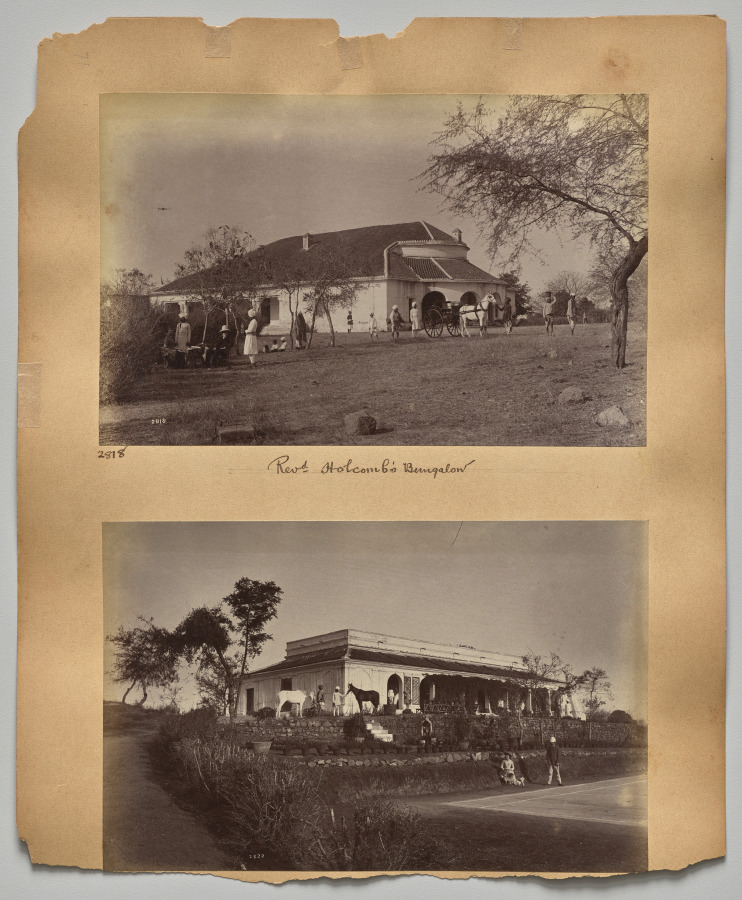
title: Reverend Holcomb's Bungalow (verso, top)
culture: India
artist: Raja Deen Dayal (Indian, 1844–1905)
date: c. 1882–87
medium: albumen print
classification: Photograph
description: These photographs are part of an album, now disassembled, of around 105 photographs taken in India between 1885 and summer 1887 that provide glimpses into the lives of the British colonial elite and royal and upper-class Indians. The museum holds another group of 37 pictures from this album (2016.266), which was probably commissioned by a British civil servant visiting or working in India around 1888 as a personal souvenir of his experiences there.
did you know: Raja Deen Dayal is regarded now, and was considered during his lifetime, to be India’s most important 19th-century photographer.